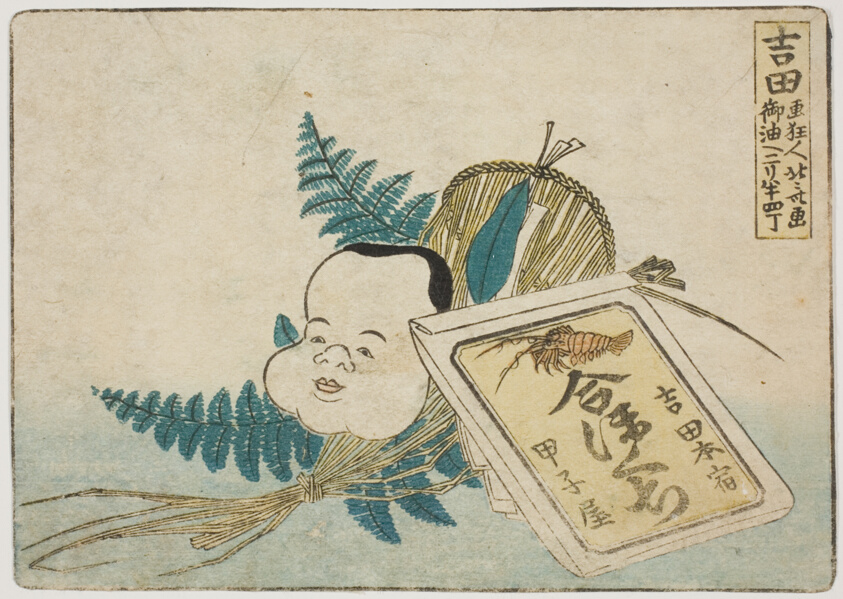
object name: Print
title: Illustration of products in Yoshida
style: Japanese (culture or style)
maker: Katsushika Hokusai 葛飾 北斎; Japanese, 1760-1849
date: 1804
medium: Color woodblock print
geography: Japan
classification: woodblock print; print; asian art